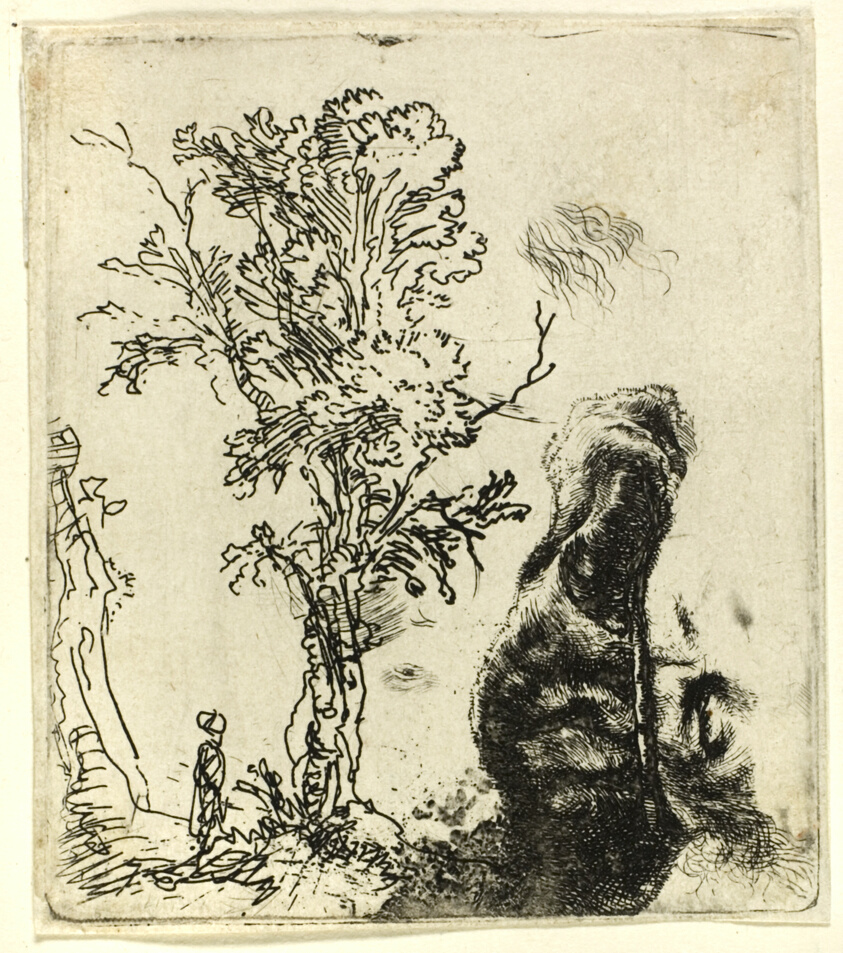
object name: Print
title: Sheet with Two Studies: A Tree, and the Upper Part of the Head of the Artist Wearing a Velvet Cap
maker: Rembrandt van Rijn (Dutch, 1606-1669)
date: c. 1644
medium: Etching on cream laid paper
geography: Holland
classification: etching; print; prints and drawing; paper